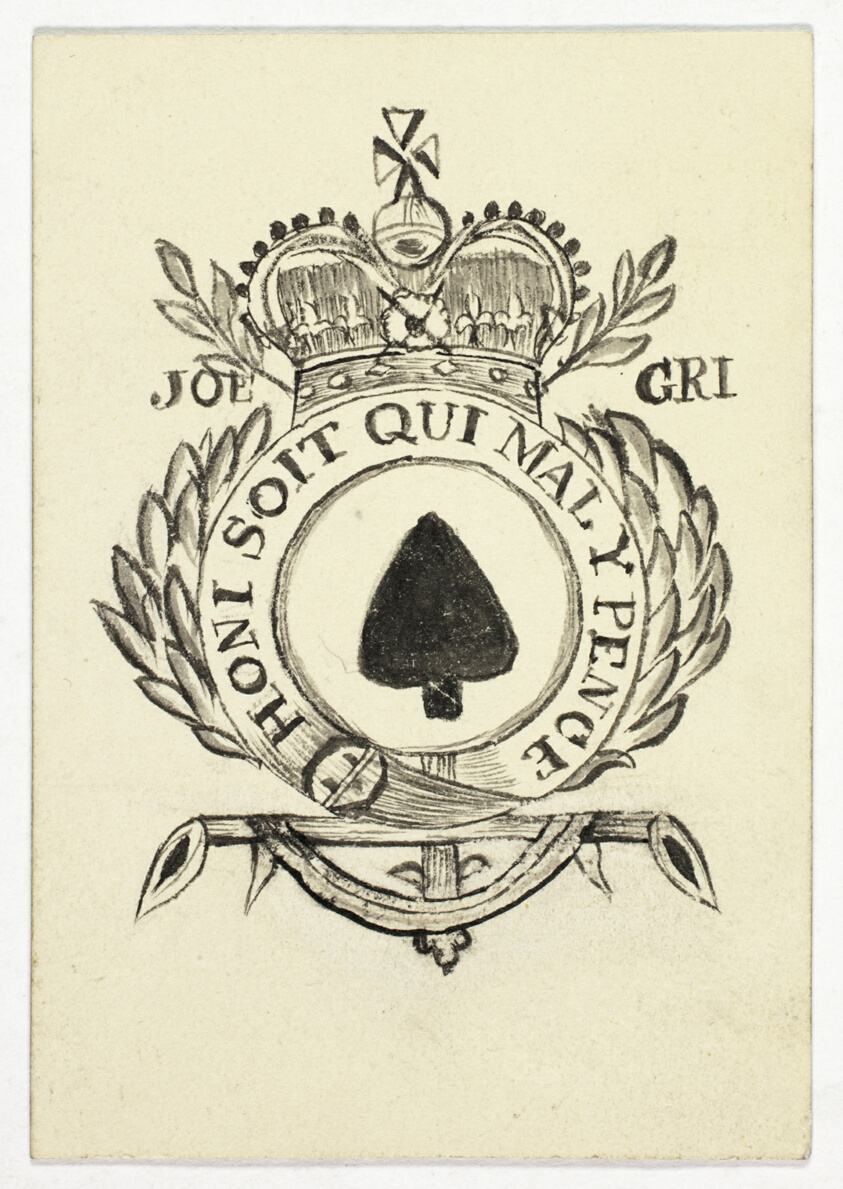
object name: Drawing and Watercolor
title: Playing Card-Ace of Spades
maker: Unknown Artist; British, 19th century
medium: Pen and black ink, with brush and black wash, on cream wove card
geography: United Kingdom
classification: pen and ink drawings; drawings (visual works); prints and drawing